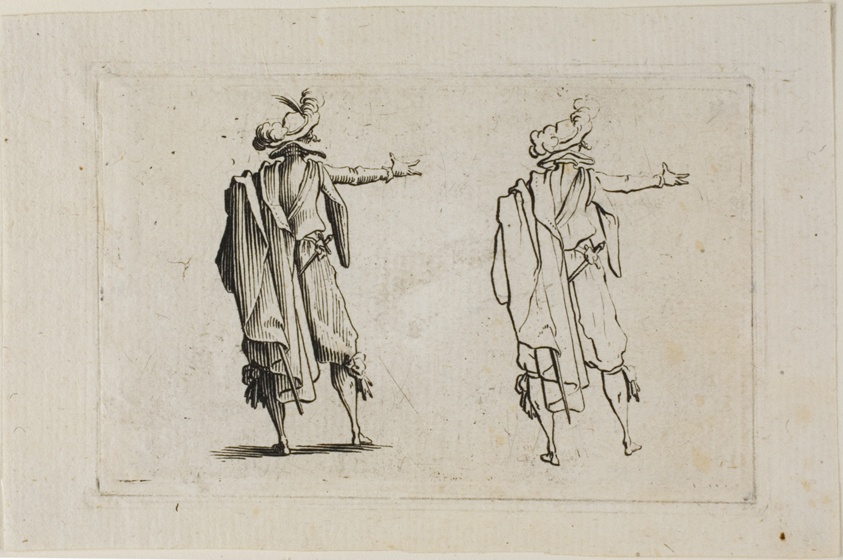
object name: Print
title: The Man Seen from the Back, Right Arm Raised, from The Caprices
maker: Jacques Callot (French, 1592-1635)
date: c. 1622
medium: Etching on ivory laid paper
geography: France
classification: etching; print; prints and drawing